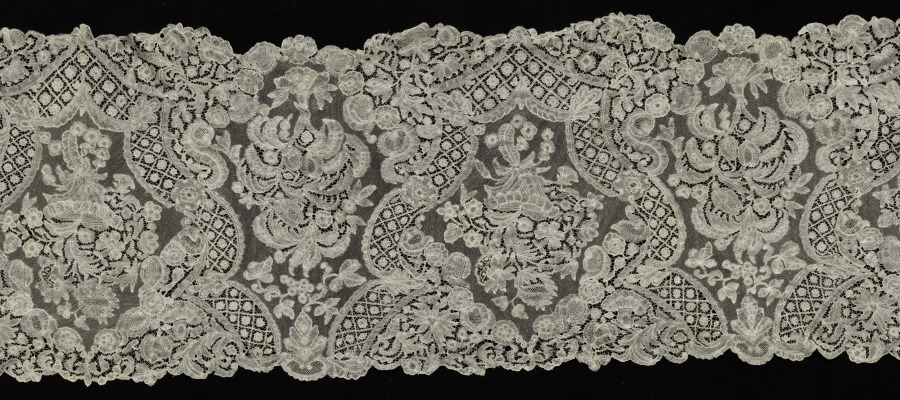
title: Lace Flounce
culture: Belgium, Brabant(?)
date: 1740–60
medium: Linen: bobbin lace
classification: Lace